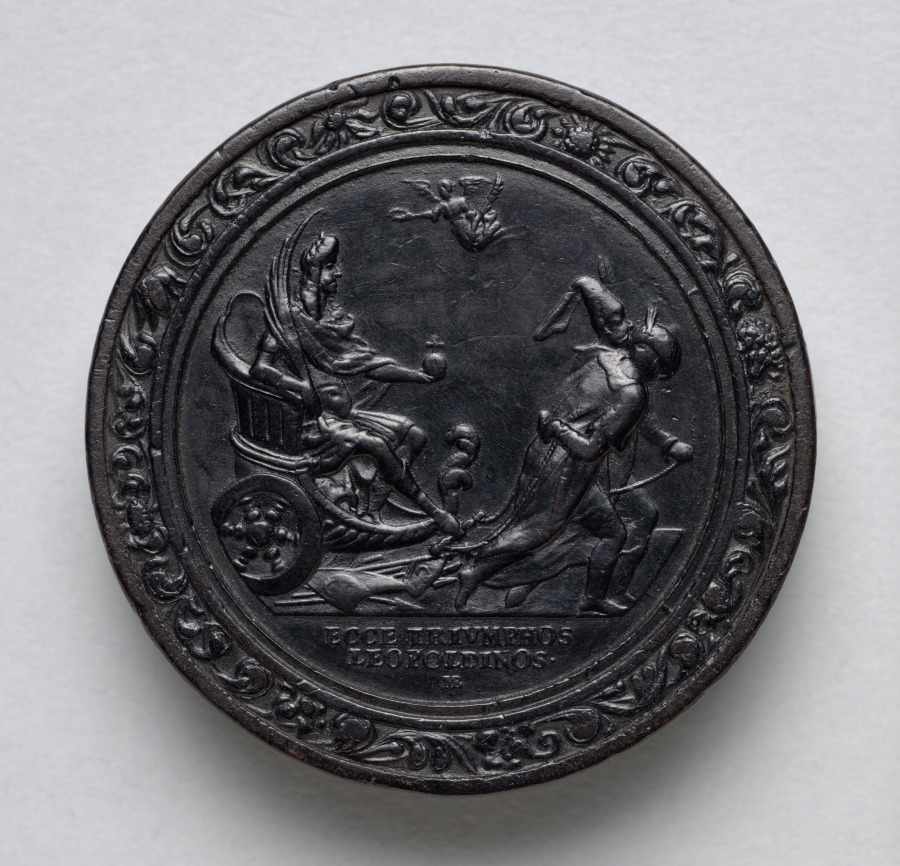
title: Gaming Piece (reverse)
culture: Germany, late 17th-early 18th Century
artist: Martin Brunner (German, 1659–1725)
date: c.1700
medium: wood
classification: Furniture and woodwork